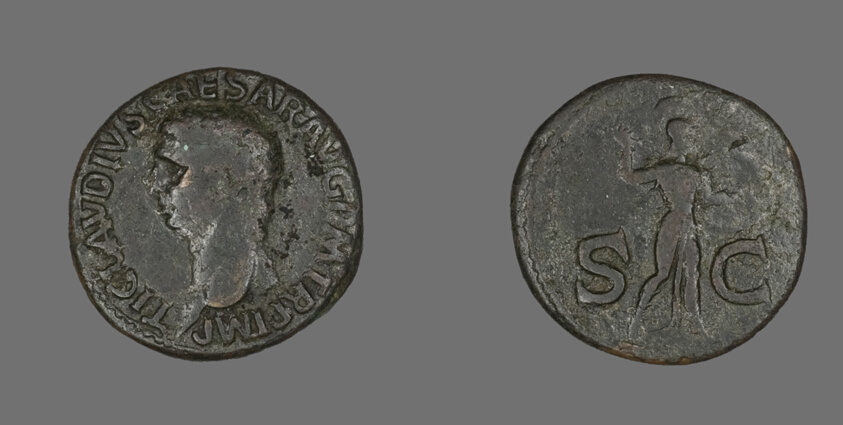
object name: Coin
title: Dupondius (Coin) Portraying Emperor Claudius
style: roman (ancient, style or period)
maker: Roman, minted in Rome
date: 41-50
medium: Bronze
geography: Roman Empire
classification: coin; ancient art